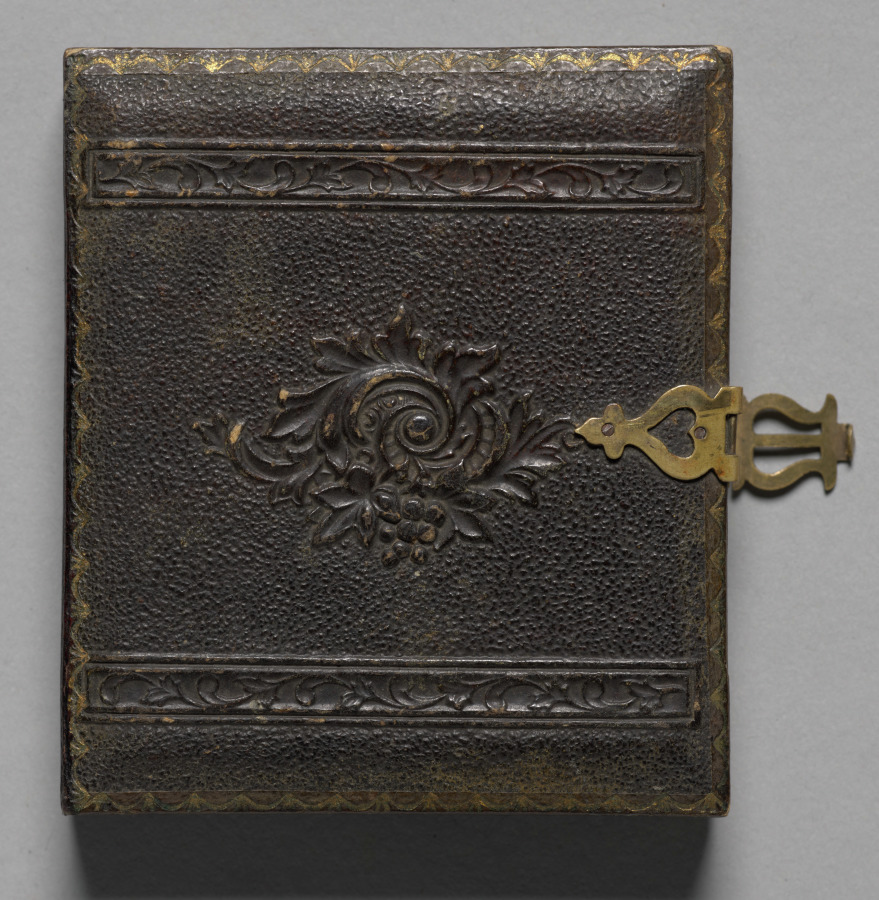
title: Poodle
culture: America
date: c. 1861–63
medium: ambrotype, tinted, sixth plate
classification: Photograph